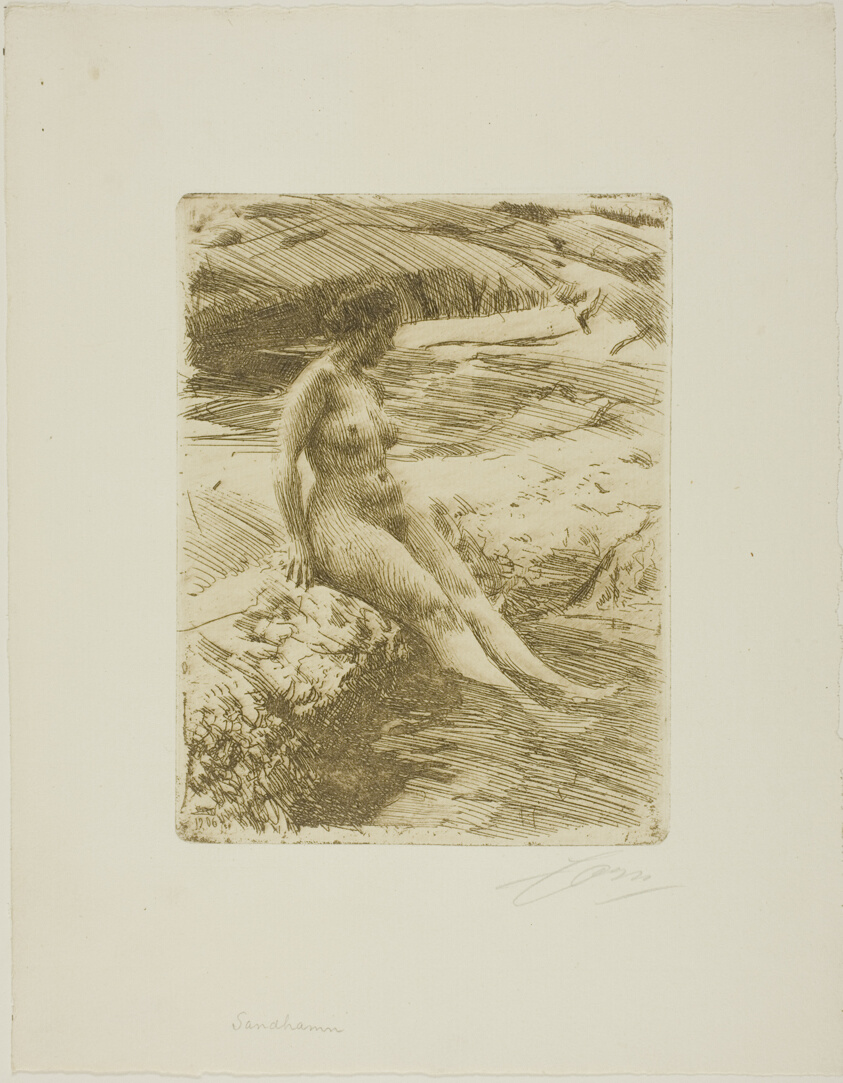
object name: Print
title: Sandhamn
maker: Anders Zorn (Swedish, 1860-1920)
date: 1906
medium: Etching on ivory laid paper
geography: Sweden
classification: etching; print; prints and drawing